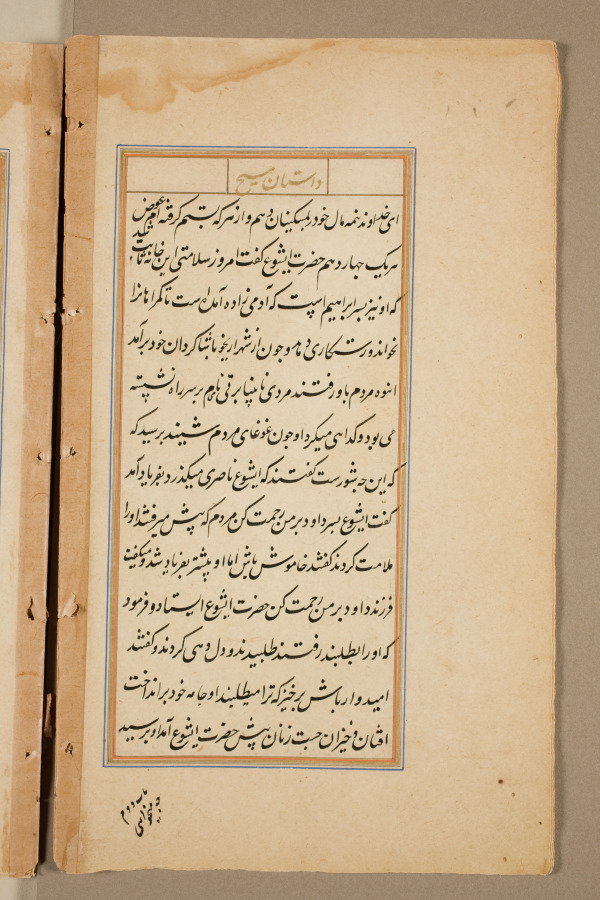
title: Text page from a Mirror of Holiness (Mir’at al-quds) of Father Jerome Xavier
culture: Mughal India, Allahabad, made for Prince Salim (1569–1627)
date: 1602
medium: Ink and gold on paper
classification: Manuscript